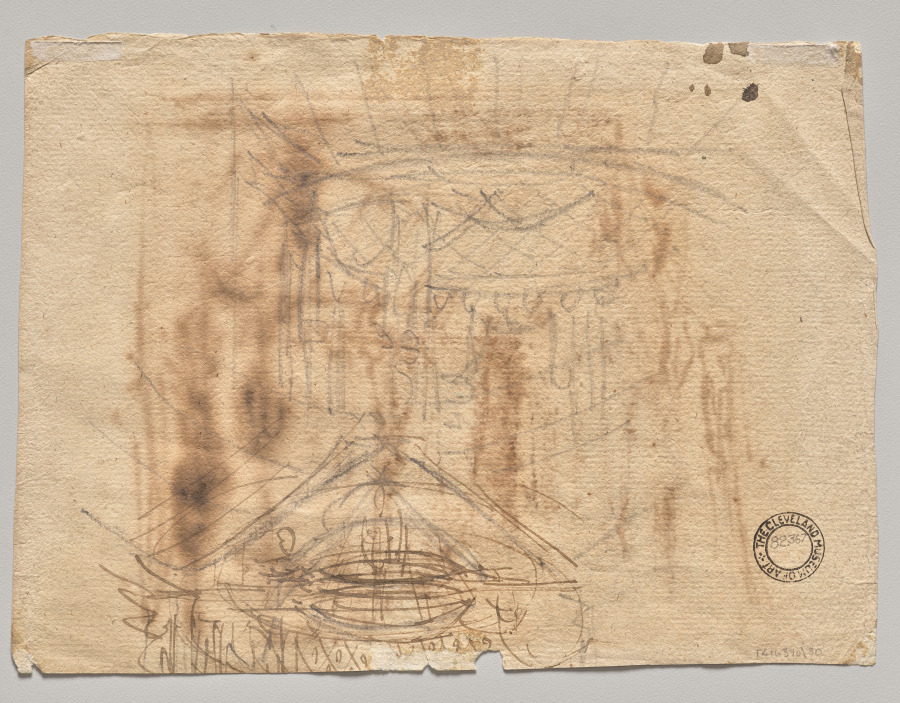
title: Two Sketches (verso)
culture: Austria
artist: Josef Platzer (Austrian, 1751–1806)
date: late 1800s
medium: drawing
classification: Drawing